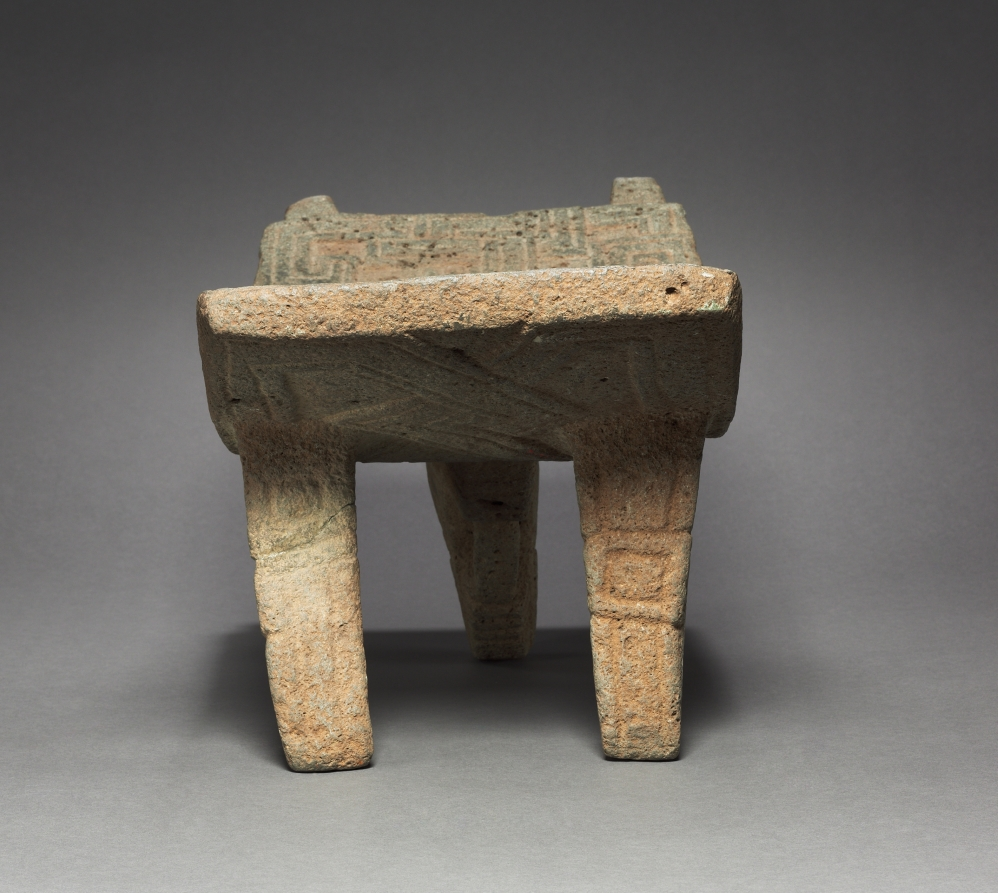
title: Metate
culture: Costa Rica, Guanacaste, northwest coast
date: 1200–1500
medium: gray volcanic stone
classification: Sculpture